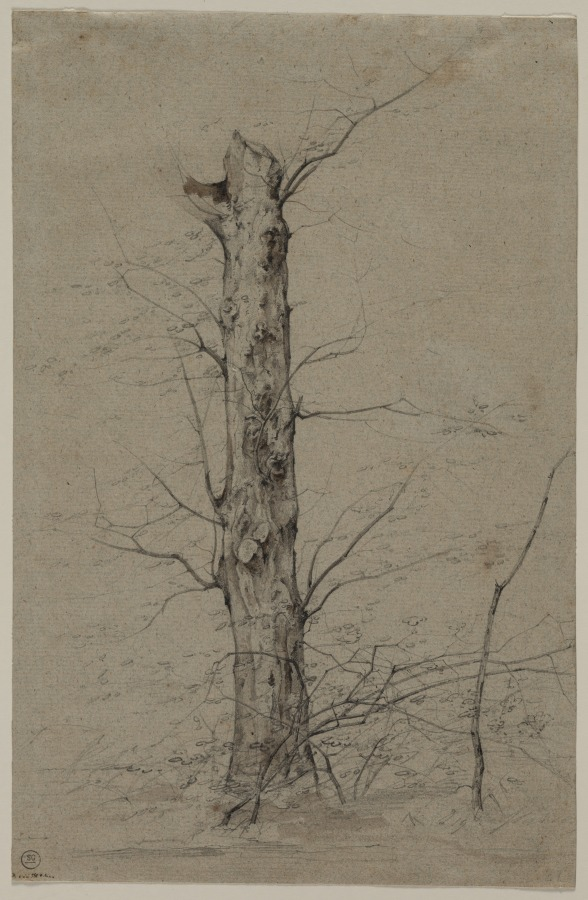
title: Tree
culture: Germany, 19th century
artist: Ludwig Ferdinand Schnorr von Carolsfeld (German, 1788–1853)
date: c. 1835–45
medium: graphite and brown wash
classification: Drawing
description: Influenced by his brother, Julius Schnorr von Carolsfeld, and other Nazarenes, Ludwig Ferdinand Schnorr von Carolsfeld first concerned himself exclusively with religious and literary subjects. In the 1830s, however, he turned more to landscape, in part under the direction of Ferdinand Olivier.